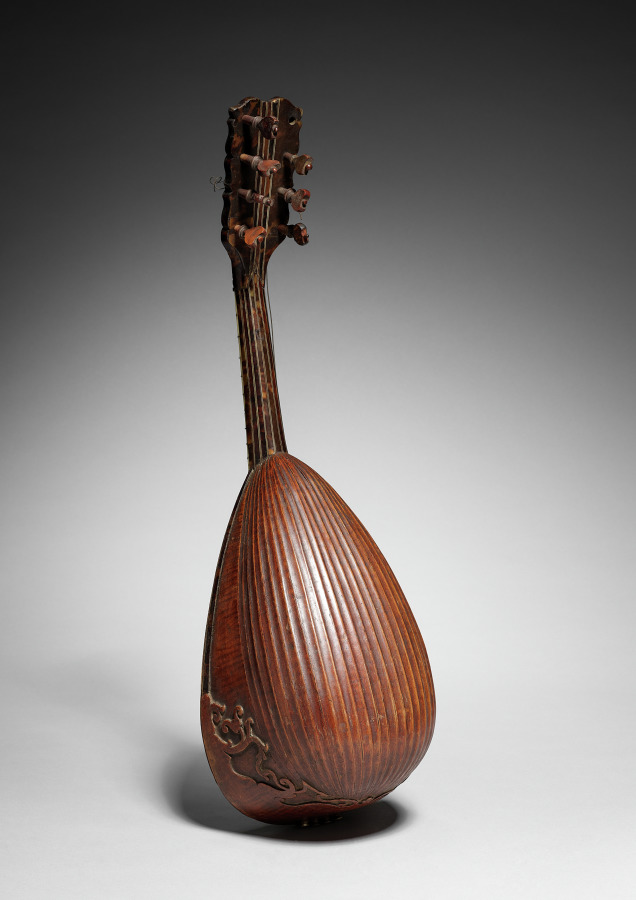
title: Mandolin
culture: Italy, Naples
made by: Giovanni Battista (Italian)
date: 1785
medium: varnished wood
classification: Musical Instrument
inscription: on ticket inside: "Gio: Battista Fabricatore fecit. An, 1785 in S. M. dell' Ajuto, Napoli."